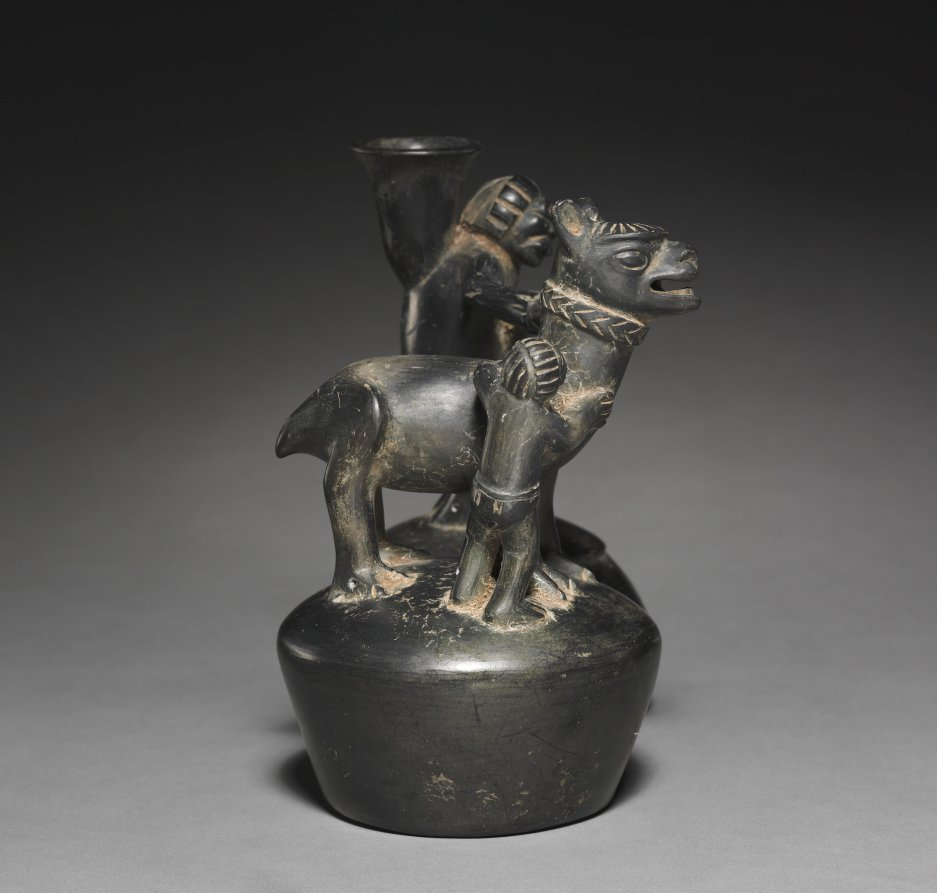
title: Double-chambered Vessel with Figures and Camelid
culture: Andes, Chimú-Inka, late 15th - mid 16th century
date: 1470–1532 (Thermoluminescence date, 1310–1610)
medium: ceramic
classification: Ceramic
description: Under the Chimú, ceramic seems to have been a less important artistic medium than for earlier north coast cultures. Accordingly, ceramics were mass-produced with molds and, rather than bearing painted scenes, often have an overall dark surface achieved by firing in a smoky atmosphere. The double-chambered vessel was made after the Inka conquered the Chimú in the 1460s.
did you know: When this vessel is filled with liquid and tilted back and forth, the camelid emits a whistling sound.